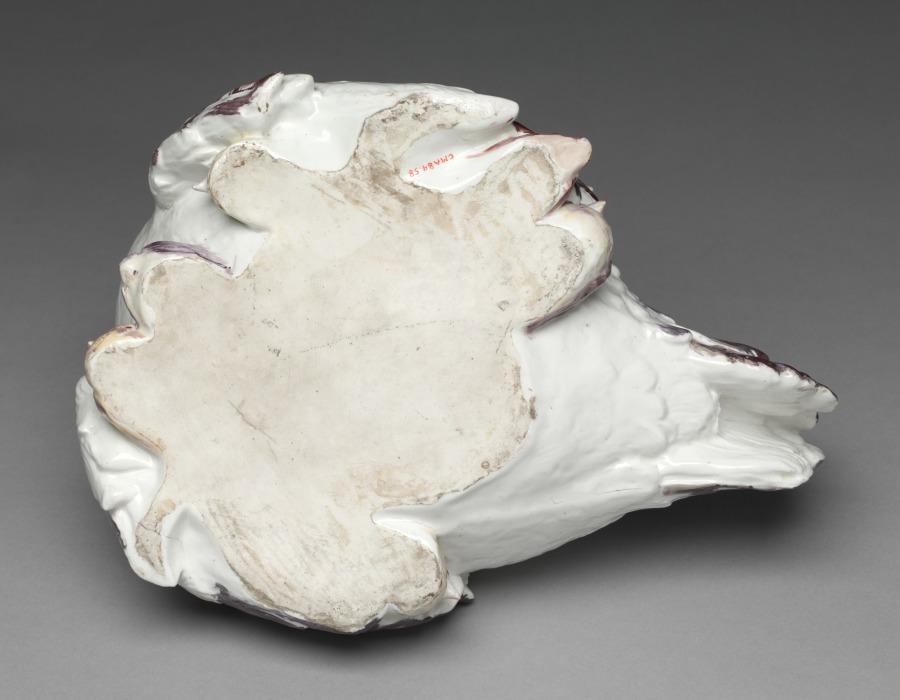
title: Hen and Chicks Tureen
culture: England, London, Chelsea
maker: Chelsea Porcelain Factory (Britain, London, 1745–84)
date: c. 1755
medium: porcelain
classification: Ceramic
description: The ceramic factory at Chelsea, located along the river Thames in western London, was Britain’s most renowned factory of decorative porcelain in the mid-1700s. Large tureens in the form of chickens or rabbits appealed to wealthy aristocrats, who took great care in developing specimen animal and poultry breeds on their country estates. The design for this particular tureen was taken from a popular seventeenth-century print by Francis Barlow depicting a farmyard.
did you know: See cover record.